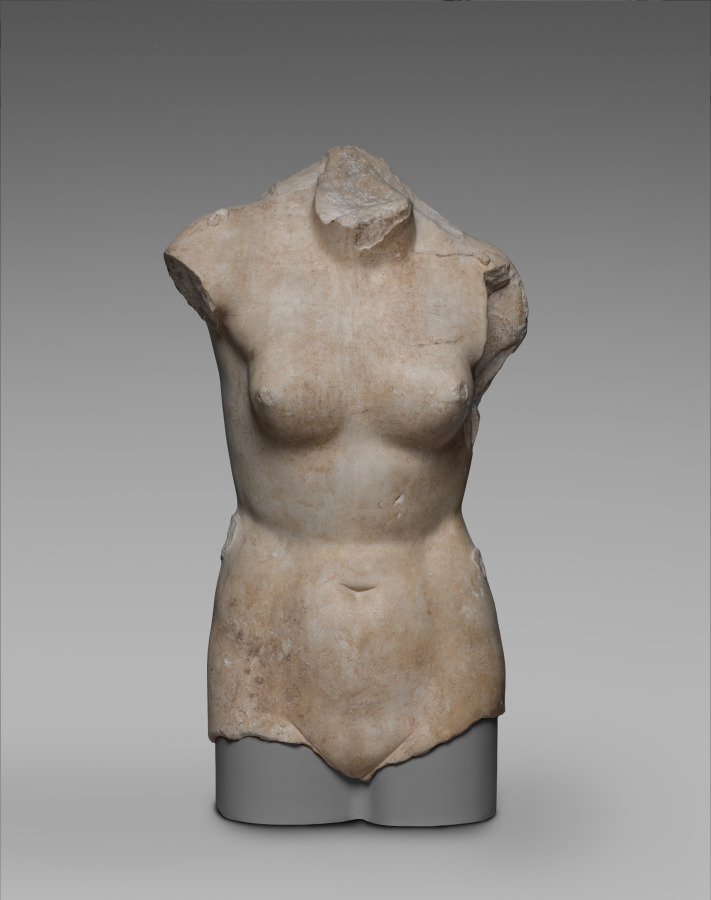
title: Aphrodite Torso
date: 200–1 BCE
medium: Thasian marble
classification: Sculpture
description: This torso can be identified through its nudity and pose as the Greek goddess of love, Aphrodite. Based on the now-lost Aphrodite of Knidos, a revolutionary marble sculpture created by Praxiteles of Athens in the mid-300s BCE, this sculpture belongs to a popular Greek and Roman type showing the goddess at her bath. With hips slightly shifted, she stood in a relaxed posture with most of her weight on one leg, probably with one hand modestly covering her pubic region and the other shielding her breasts or holding drapery. Alternatively, one or both hands may have tended to her wet hair, some of which falls over her neck and upper back.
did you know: This torso is based on the Aphrodite of Knidos, a Greek original by the master sculptor Praxiteles.